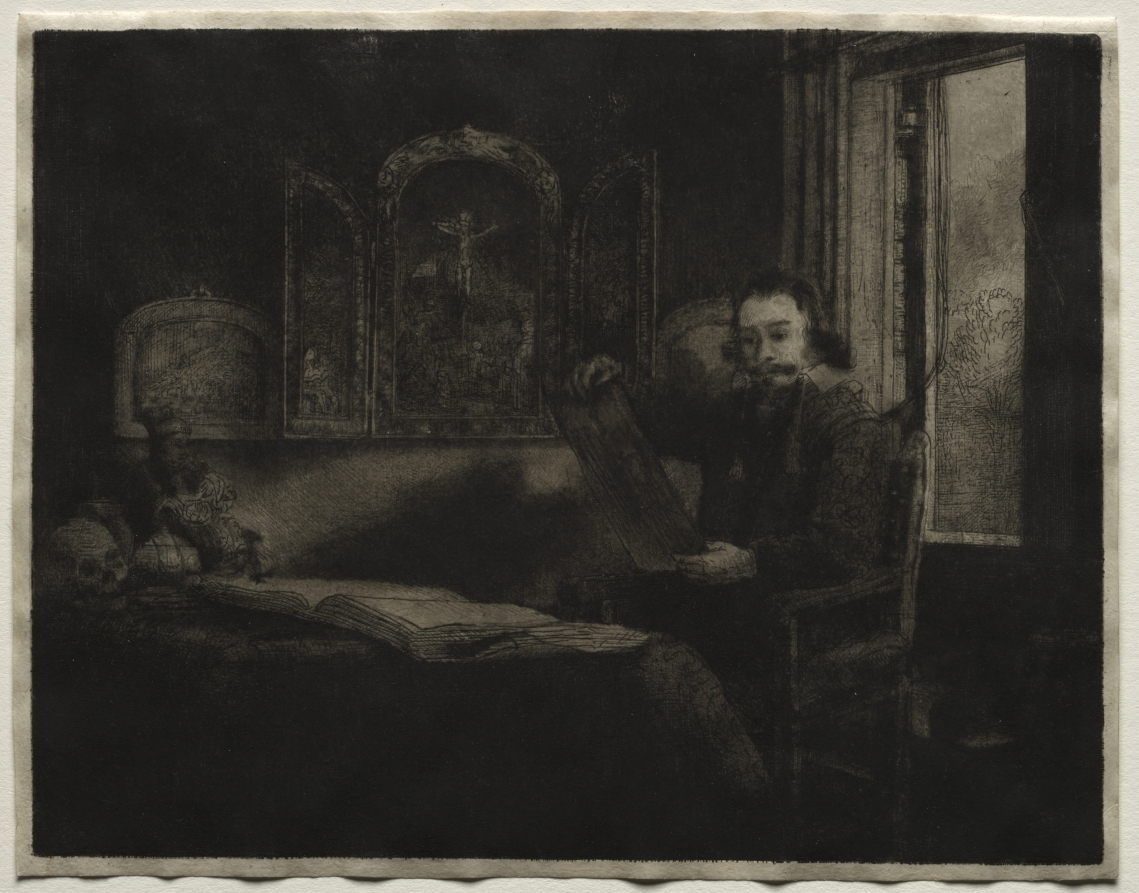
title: Abraham Francen, Apothecary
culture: Netherlands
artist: Rembrandt van Rijn (Dutch, 1606–1669)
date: c. 1657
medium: etching, engraving and drypoint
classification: Print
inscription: VERSO, upper left, in pen and brown ink: _____P. Mariette 1670 ; upper right, in graphite: M 72-[I?] ; center, in graphite: 732[sideways] ; lower left, in pen and brown ink: British Museum / [UHC?] ; lower left, in graphite: 153 153 ; lower left, in light gray ink: [hc?] ; lower left, in graphite: a63435 ; lower left, in graphite: A11644 ; lower center, in graphite: 4 ; lower center, in graphite: J / I / U ; lower right, in graphite: EWO